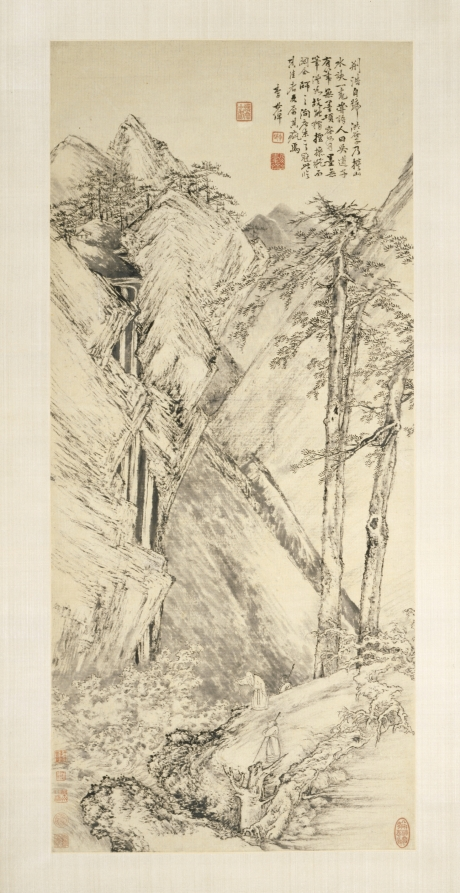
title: Landscape after Jing Hao and Guan Tong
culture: China, Qing dynasty (1644-1911)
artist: Li Shizhuo (Chinese, c. 1690–1770)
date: c. 1690–1770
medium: hanging scroll; ink on paper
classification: Painting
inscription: 荆浩自號洪谷子，乃撰山水訣一卷。嘗誇人曰：吳道子有筆無墨，項容有墨無筆。洪谷故能獨擅操縱，而關仝師之。絢唐末之冠。此臨其佳者而更屛其疵焉。李世倬 [印]卓氏; 穀齋; 蝯詹上_ [印, 右下]几研精嚴見性情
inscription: 5 additional seals: 1 of C. C. Wang 王季遷 (1907–2003); 4 unidentified.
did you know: Three figures on the lower slope excitedly watch the waves and foam rising beneath the waterfall.